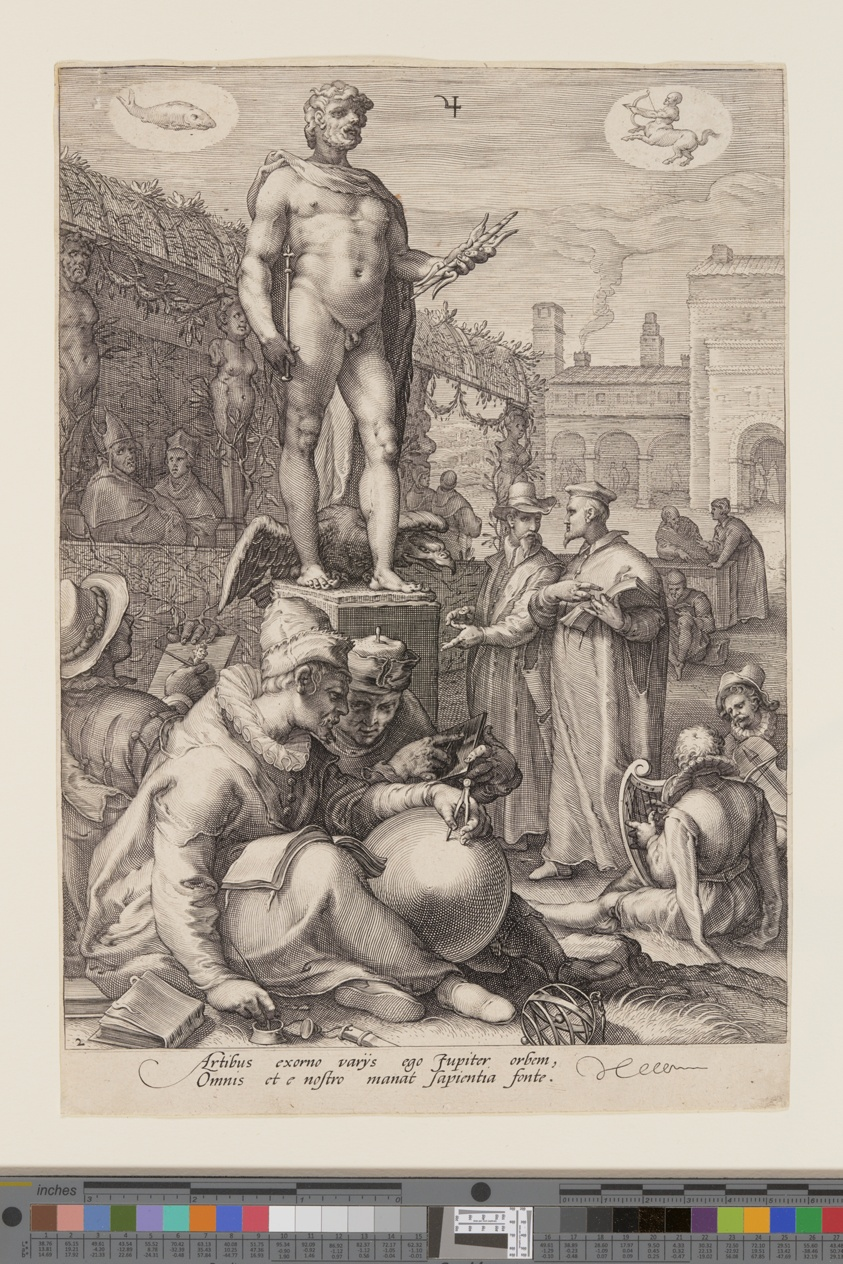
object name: Print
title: Jupiter Presiding over the Liberal Arts, from Seven Planetary Gods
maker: Jan Saenredam (Dutch, 1565–1607); after Hendrick Goltzius (Dutch, 1558–1617)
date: 1596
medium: Engraving on ivory laid paper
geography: Netherlands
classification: engraving; paper; print; prints and drawing